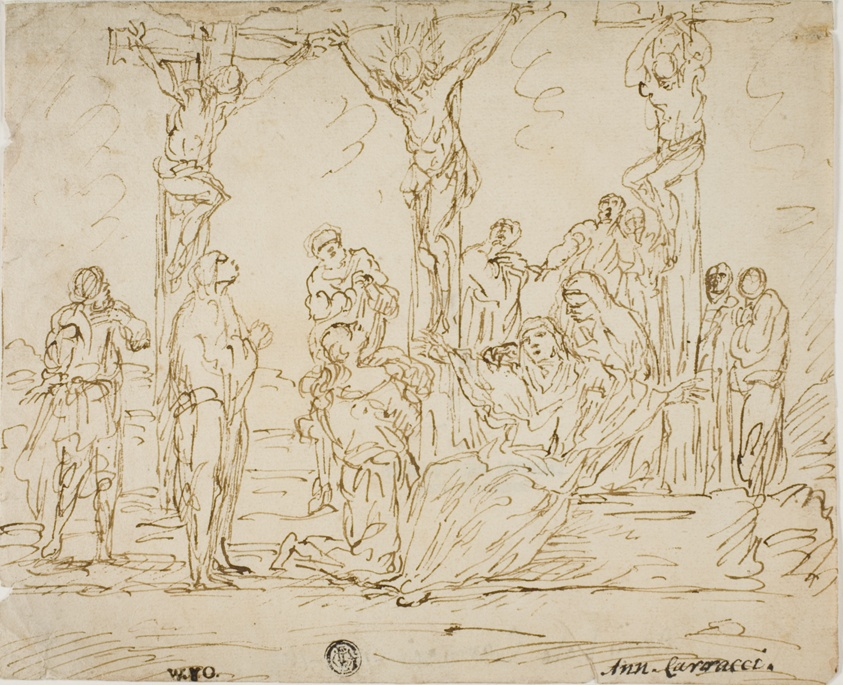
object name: Drawing and Watercolor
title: Lamentation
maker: Unknown artist; French or Italian (17th century)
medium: Pen and brown ink on cream laid paper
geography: France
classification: pen and ink drawings; paper; drawings (visual works); prints and drawing